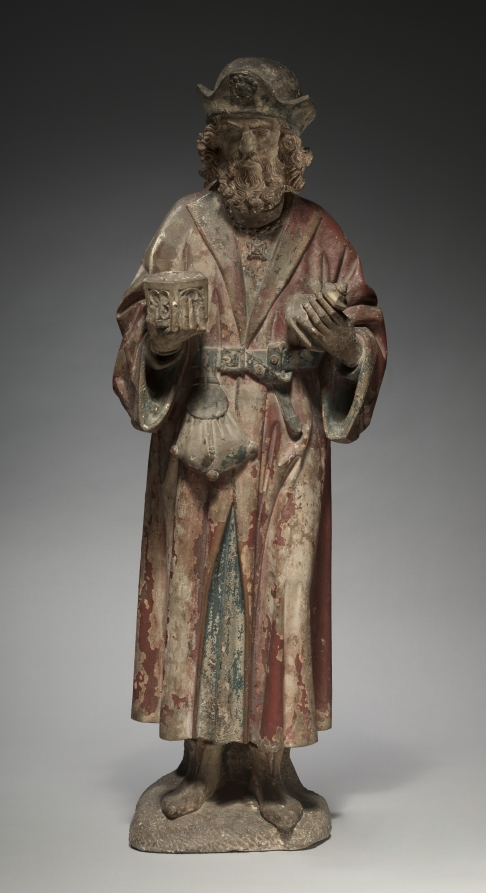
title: Magus from an Adoration Group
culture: France, possibly Champagne, 15th century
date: c. 1460–1475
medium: polychromed limestone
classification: Sculpture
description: This sculpture represents one of the three Magi or kings who witnessed the birth of Jesus. The Magi are identified as Caspar, Melchior, and Balthazar and are typically shown in art bearing their gifts of gold, frankincense, and myrrh. Joseph is often present in these scenes as are shepherds.The single figure shown here was originally part of a sculptural group with many figures. He is shown holding an ornate receptacle with lid. Other figures from the group are not known to have survived, and which Magus the sculpture was intended to represent cannot be clearly established.